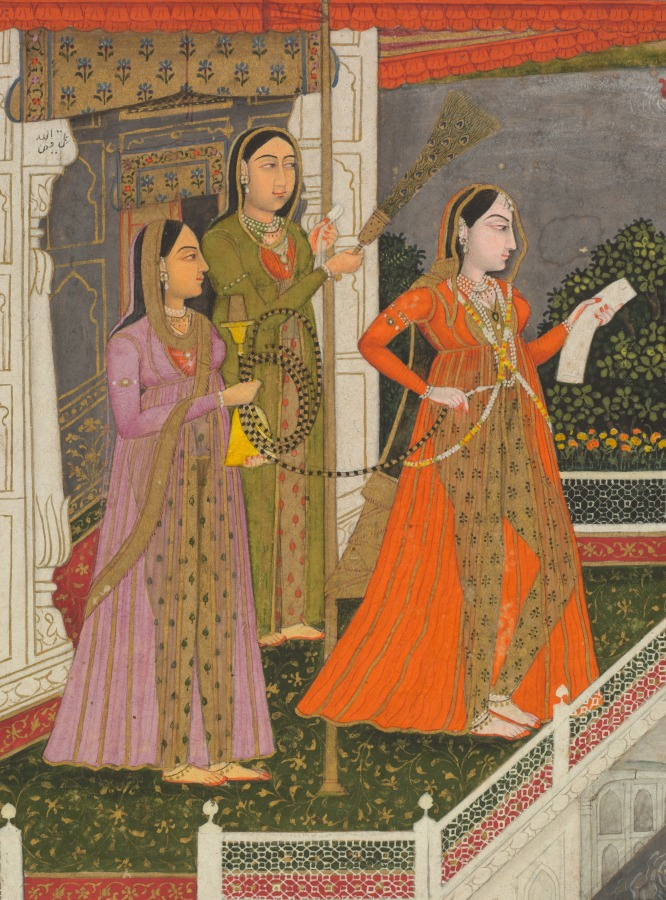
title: A blindfolded suitor is brought before a princess (recto)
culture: India, Lucknow, Mughal, 18th century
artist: Fayzullah (Indian, active c. 1730–1765)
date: 1755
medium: Gum tempera and gold on paper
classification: Painting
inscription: signed in two places: on capital of central pillar: 'amal - i Fayzullah ("the workof Fayzullah"), and below: bi - qalam i Fayzullah Musavvir walad - i Faqirullah Musavvir dar sanna 1755 ("by the pen of Fayazullah the painter son of Faqirullah the painter in the the year 1755")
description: In a scene set on a carpeted terrace in the women’s palace quarters, an older woman of the harem drags a young prince with a white blindfold over his eyes before a princess grasping a document. Such a scene evokes a literary allusion of a princess who selects her suitor, but it also resonates with circumstances at the Mughal court. Signed and dated by the artist, this painting was completed at a time when powerful women wielded control over the emperor, and Ahmad Shah Bahadur (reigned 1748–54), son and successor of Muhammad Shah, had been blinded and deposed less than one year before.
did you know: A gigantic crocodile swallows a horse and rider attempting to cross the river.